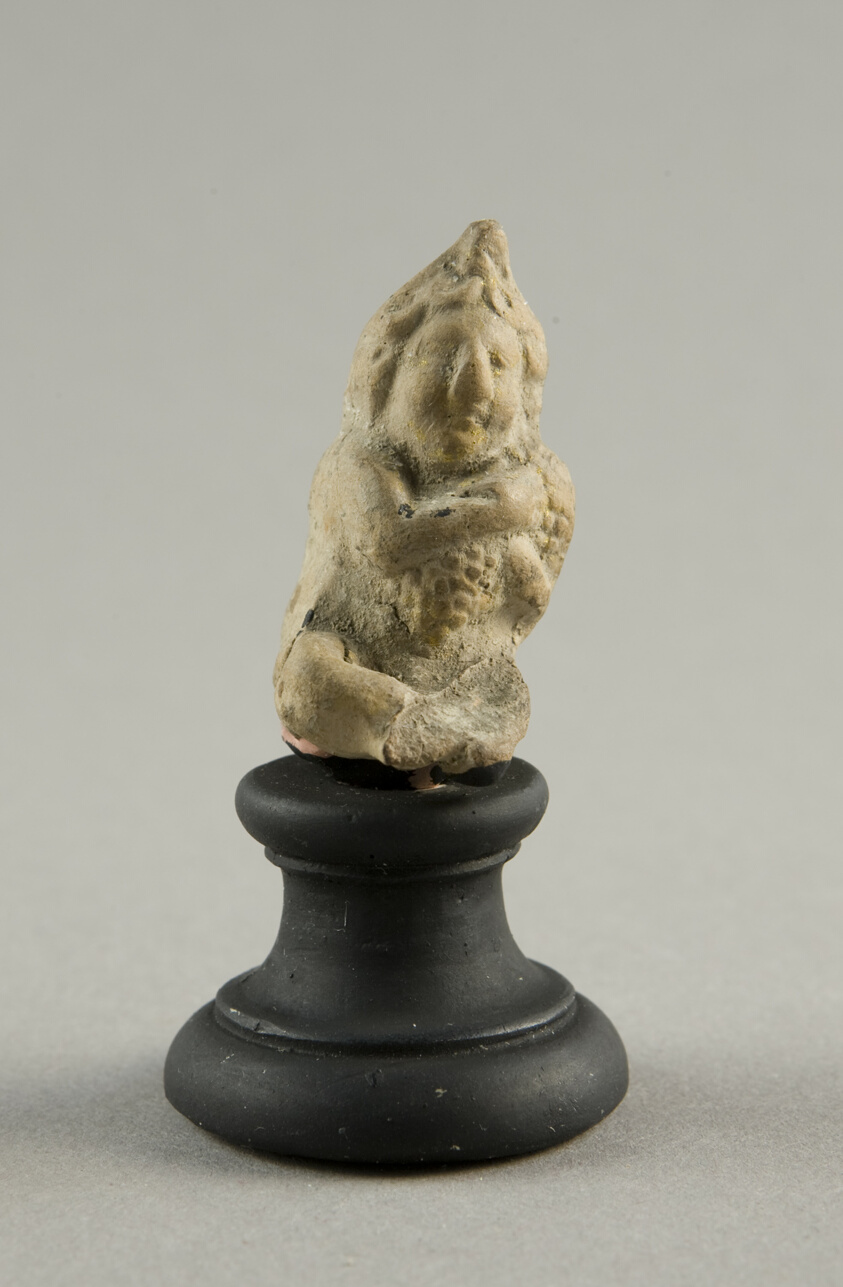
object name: Sculpture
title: Figurine of a Child Clutching Grapes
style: greek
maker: Greek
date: 2nd-1st century BCE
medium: terracotta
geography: Greece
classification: earthenware; ceramics; sculpture; ancient art